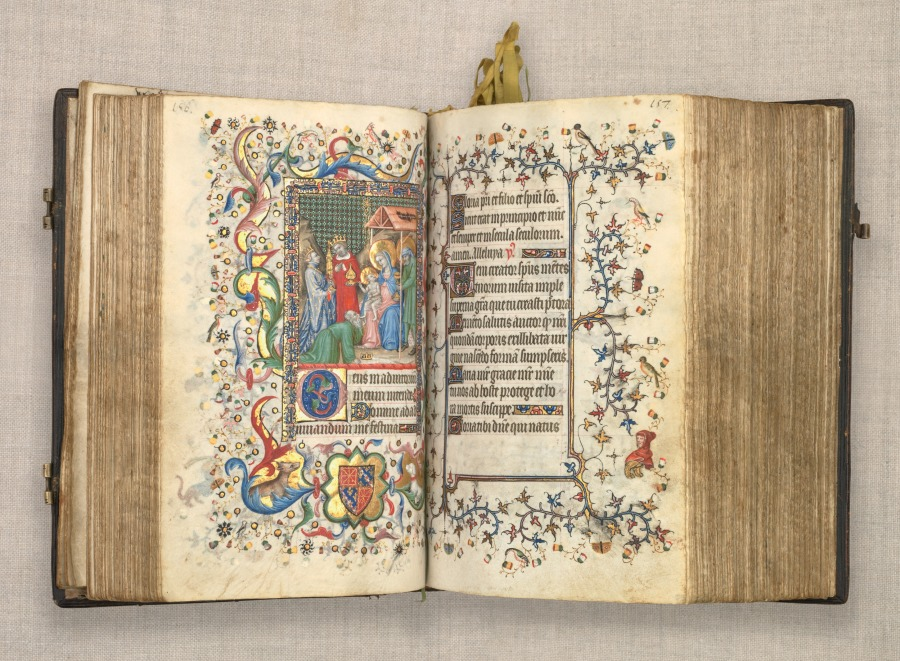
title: Hours of Charles the Noble, King of Navarre (1361-1425): fol. 79r, Text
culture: France, Paris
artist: Master of the Brussels Initials and Associates (French)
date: c. 1405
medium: ink, tempera, and gold on vellum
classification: Bound Volume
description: This precious volume was obviously highly prized by its owner, the French-born King of Navarre, who had his coat of arms painted on no less than twenty folios. Rather than directly commissioning this manuscript from a specific workshop, it seems that Charles the Noble acquired his book of hours -- perhaps ready-made for the luxury market -- while on a trip to Paris in 1404-05. A collaborative effort, six painting styles are evidenced within the pages of this codex, those of two Italians, two Frenchmen, and two Netherlanders. The painter who was responsible for the planning and decoration of the book, and who produced seventeen of the large miniatures, was a Bolognese artist known as the Master of the Brussels Initials. His principal assistant, responsible for most of the borders, was a Florentine who signed his name "Zecho" da Firenze on folio 208 verso.